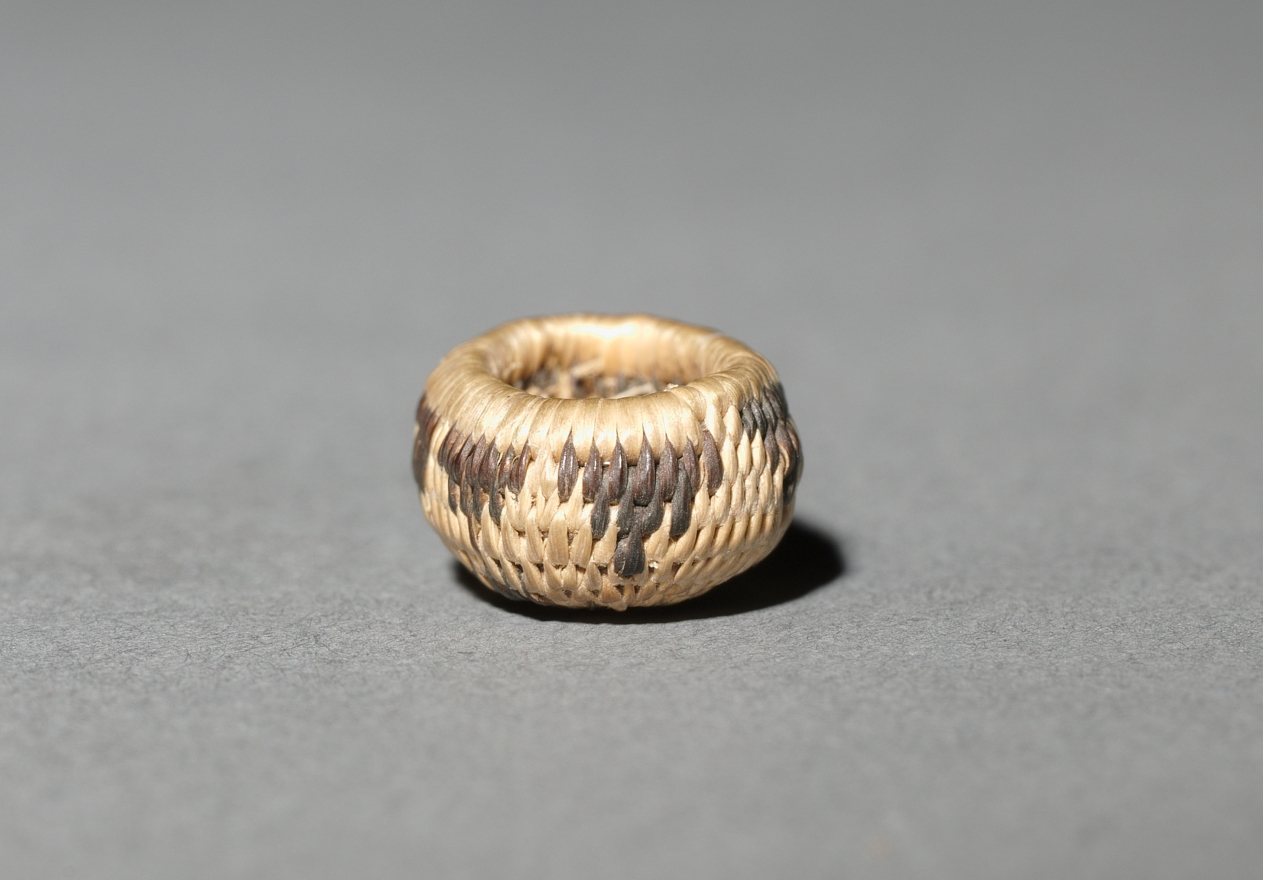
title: Miniature Oval Basket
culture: California, Pomo, 20th century (?)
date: Early 1900s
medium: coiled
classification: Basketry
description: Miniature baskets were made to demonstrate the basket-maker’s virtuoso skill, and these tiny marvels seem to be no exception—the smallest are just a few millimeters wide but still patterned. For such fine work, dexterity was required as much for preparation of materials as for weaving.